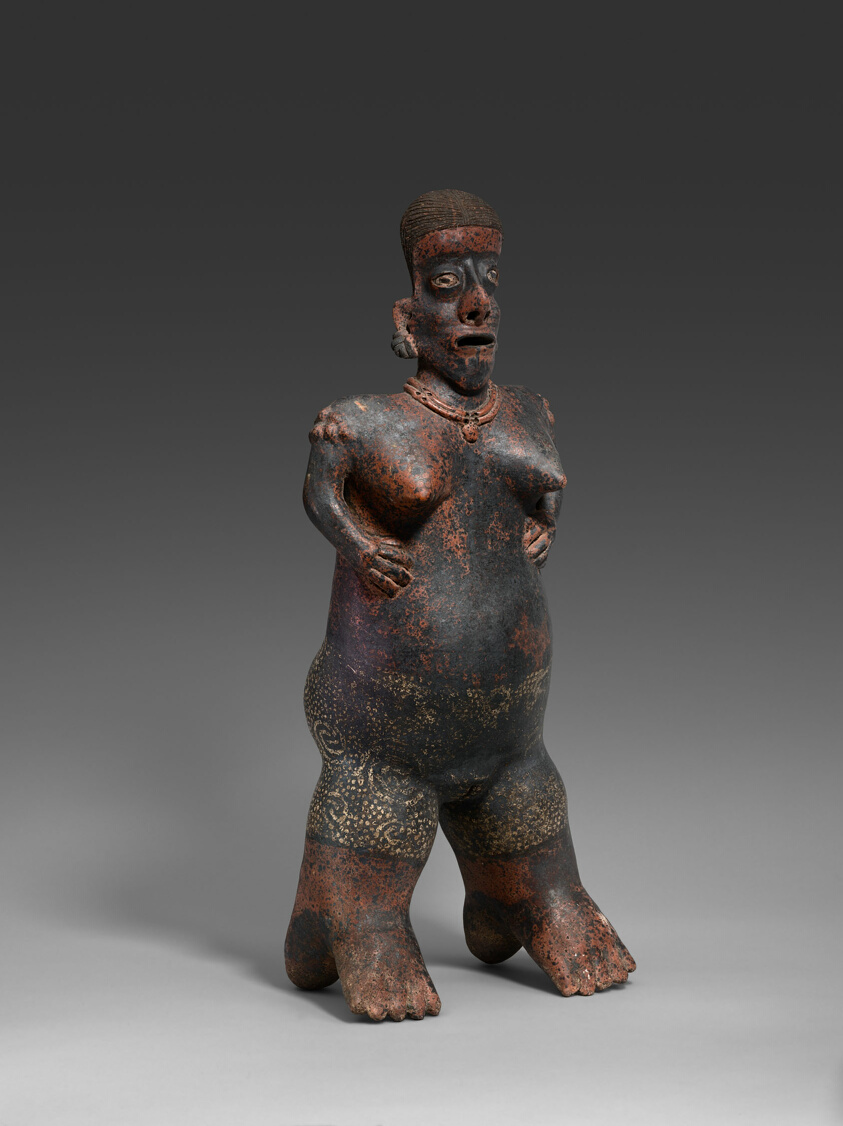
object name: Sculpture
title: Standing Female Figure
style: nayarit, mesoamerican, Pre-Columbian, americas, west mexico, Arts of the Americas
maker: Nayarit (Nayarit, Mexico)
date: 100–300 CE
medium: Ceramic and pigment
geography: Mexico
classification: earthenware; ceramics; sculpture; art of the americas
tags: people, costume, elite, female